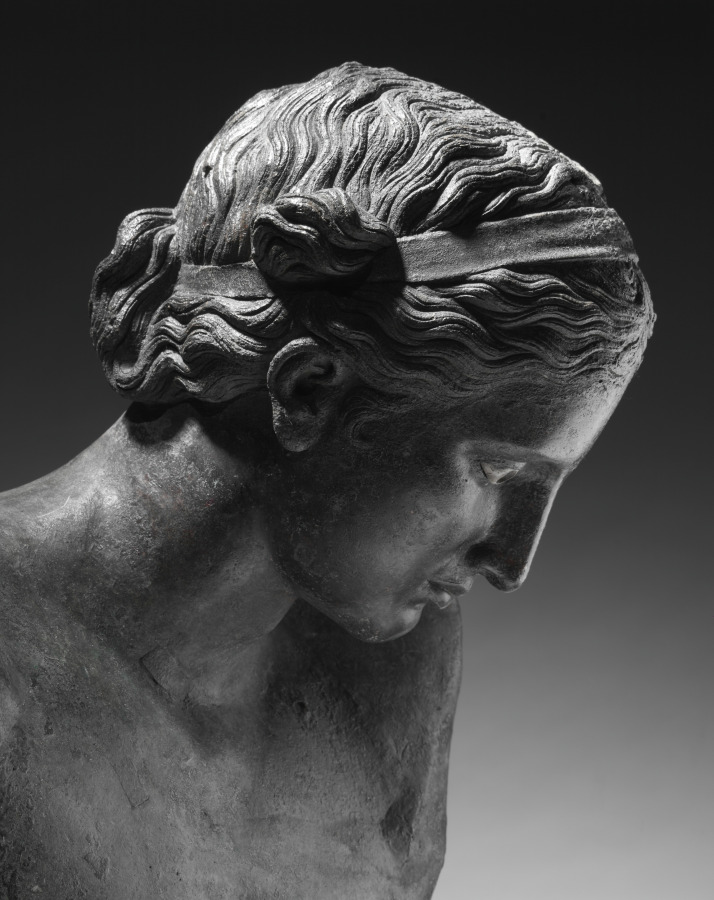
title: The Cleveland Apollo: Apollo Sauroktonos (Lizard-Slayer) or Apollo the Python-Slayer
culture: Greece, Athens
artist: attributed to Praxiteles (Greek, Athenian, c. 400–330 BCE)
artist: or Follower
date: c. 350–200 BCE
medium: bronze, copper and stone inlay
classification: Sculpture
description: The Cleveland Apollo was cast in multiple sections using the indirect lost-wax technique. First, molds were taken from a working model (now no longer known or preserved), which was then reproduced in hollow wax sections, each filled with a clay core. After details were added to the wax models, each was encased in clay. Then, the wax was heated, melted out, and replaced by molten bronze. Once cooled, the hollow bronze sections were fused together and finished, patching flaws and adding inlays and other details. Since the initial model was retained, it could be reused, allowing ancient sculptors to create multiples and variations of favorite works. Thus, remarkably, the Cleveland Apollo may once have been one of several such works. The consistently thin walls of the Cleveland Apollo (mostly 5-6 mm thick), together with the nearly invisible joins between most cast sections, show that it was created by highly skilled sculptors and foundry workers. Close looking reveals several noteworthy features. First, ovals atop the right foot mark a fusion weld, where molten bronze pooled to join separately cast sections. Second, small rectangular bronze patches cover parts of the surface (especially the right hip), each carefully cut and then hammered into place over holes or other casting defects. Inlaid lips, nipples, and eyes (the right ancient stone, the left now a modern replacement) added to the lifelike appearance of the sculpture, contrasting with the once bronze-colored skin. Finally, radiography helps to illuminate hidden features, such as the cast edge of the neck of Apollo.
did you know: Ovals across the top of the right foot show a clear join between separately cast sections.